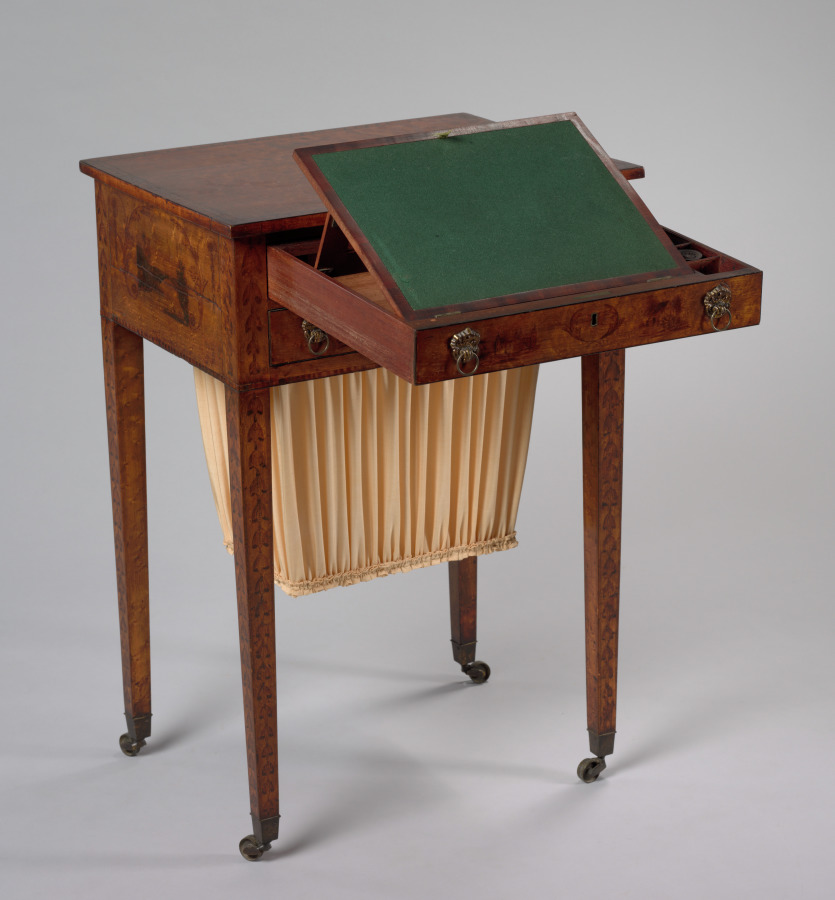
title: Work Table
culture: America, Massachusetts, Boston, 19th century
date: 1800–1825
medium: maple, brass hardware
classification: Furniture and woodwork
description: Needlework typically occupied several hours of a well-to-do woman's day. Worktables are compact, lightweight, and therefore portable. Casters permitted one to move the table around a room and to reposition it easily for sewing or writing. The top drawer of this example was designed to hold writing equipment and contains a writing tablet that could be placed at a convenient slant. The second drawer is divided into compartments for sewing equipment. Needlework was stored in a bag below, accessible by pulling its frame out of one of the table's shorter sides. This simple, small table with its slender, tapered legs is decorated with painted landscapes almost certainly copied from engravings. From about 1800–1825 furniture decoration of this kind was taught in schools for proper young ladies of New England.